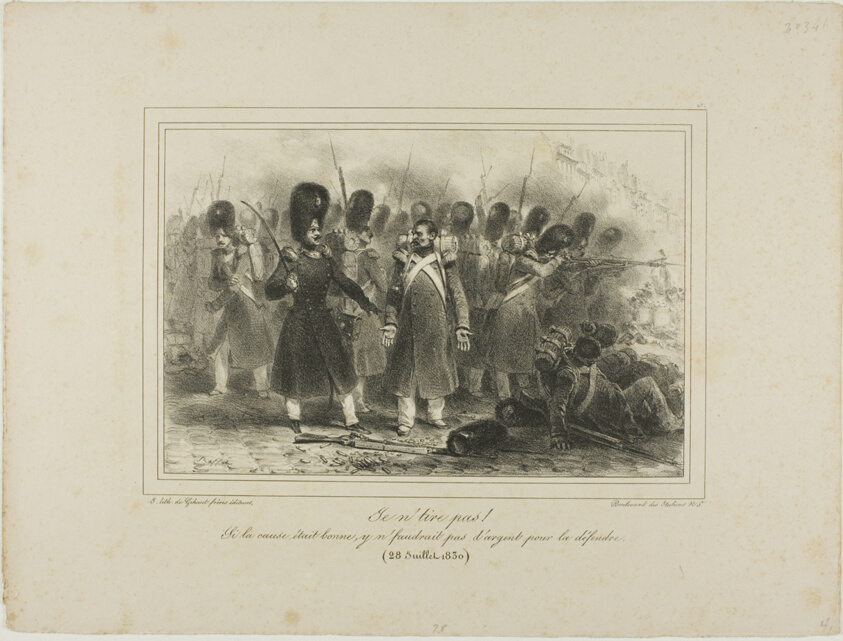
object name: Print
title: Je n'tire pas! Si la cause était bonne, y n'faudrait pas d'argent pour la défendre. 28 Juillet 1830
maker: Denis Auguste Marie Raffet (French, 1804-1860); printed by Chez Gihaut Frères (French, 19th century)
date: 1831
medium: Lithograph on ivory wove paper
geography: France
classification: lithograph; print; prints and drawing